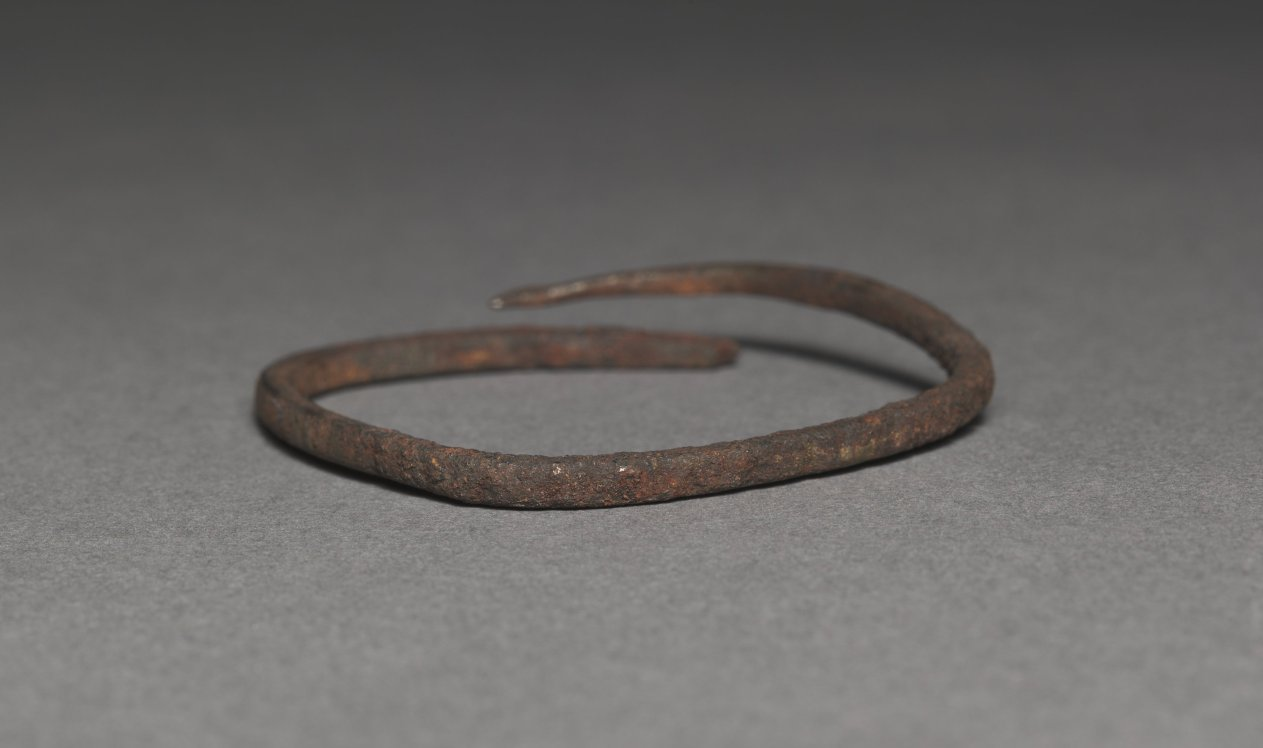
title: Bracelet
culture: Egypt, Greco-Roman period (332 BCE–395 CE), Roman empire (30 BCE–395 CE)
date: 200–400 CE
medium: iron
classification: Jewelry